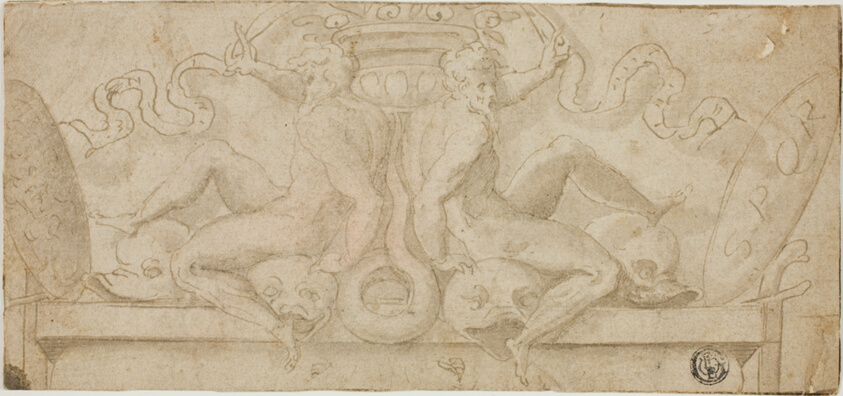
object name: Drawing and Watercolor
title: Design for Overdoor: Two Ignudi with Dolphins and Shields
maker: Circle of Francesco de'Rossi, called Salviati; Italian, 1510-1563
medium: Pen and brown ink with brush and brown wash and traces of red chalk, on cream laid paper, laid down on ivory laid paper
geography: Italy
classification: ink with wash; drawings (visual works); prints and drawing